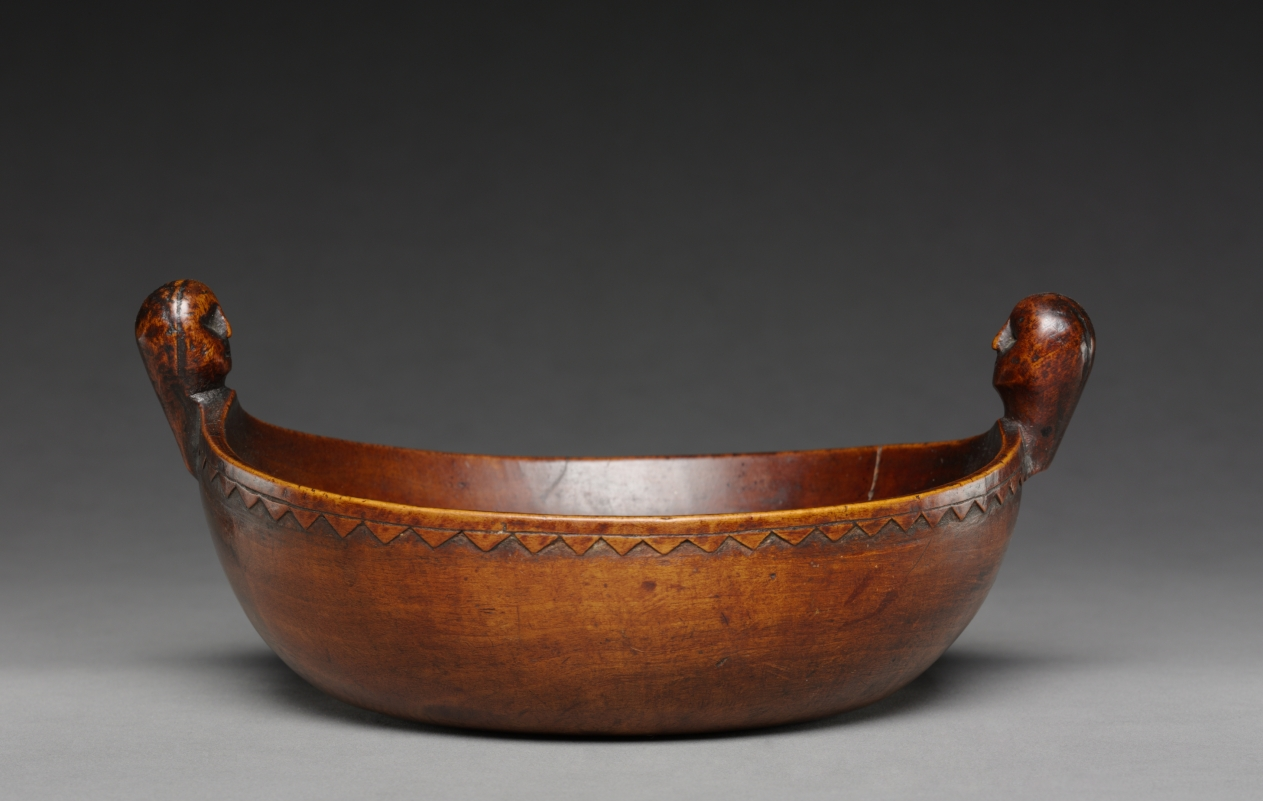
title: Bowl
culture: Native North America, Northeastern Woodlands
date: early 1800s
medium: wood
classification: Wood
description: Fine wooden bowls were often used during feasts in the Northeastern Woodlands. The heads on the rims may represent spirit beings, perhaps the owner’s guardian spirits, acquired through dreams or visions—thought to be the ultimate sources of truth. The medium may also be profoundly meaningful. A Great Lakes (Meskwaki) Native said in 1911, “The murmur of the trees when the wind passes through is but the voices of our grandparents. Often a whole forest hums with talk . . . we often hear the sound of their laughter and the sound of their lamentations.”